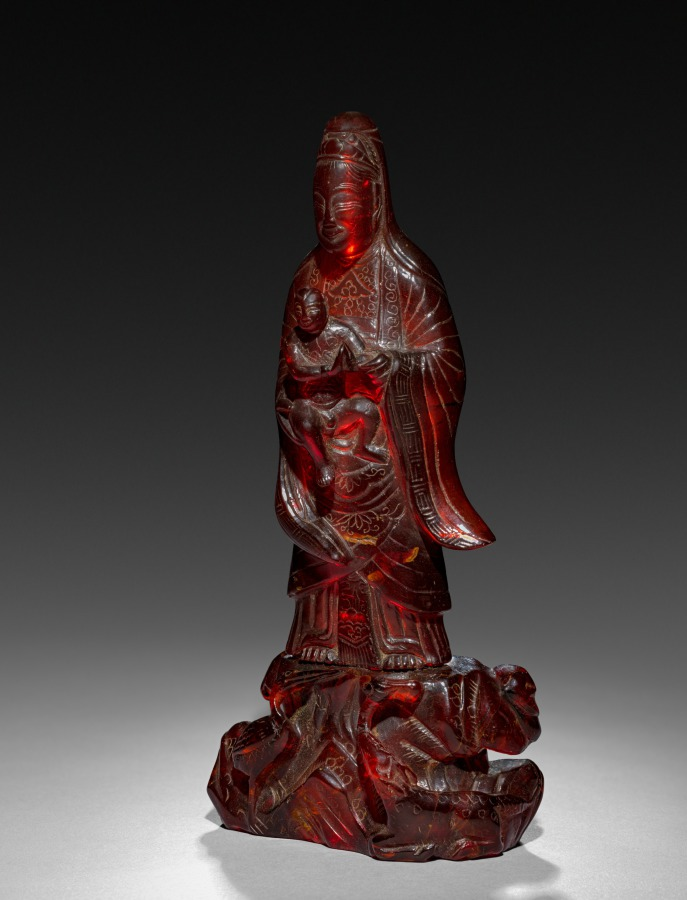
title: Guanyin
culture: China, Qing dynasty (1644-1911)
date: 18th Century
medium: amber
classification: Stone